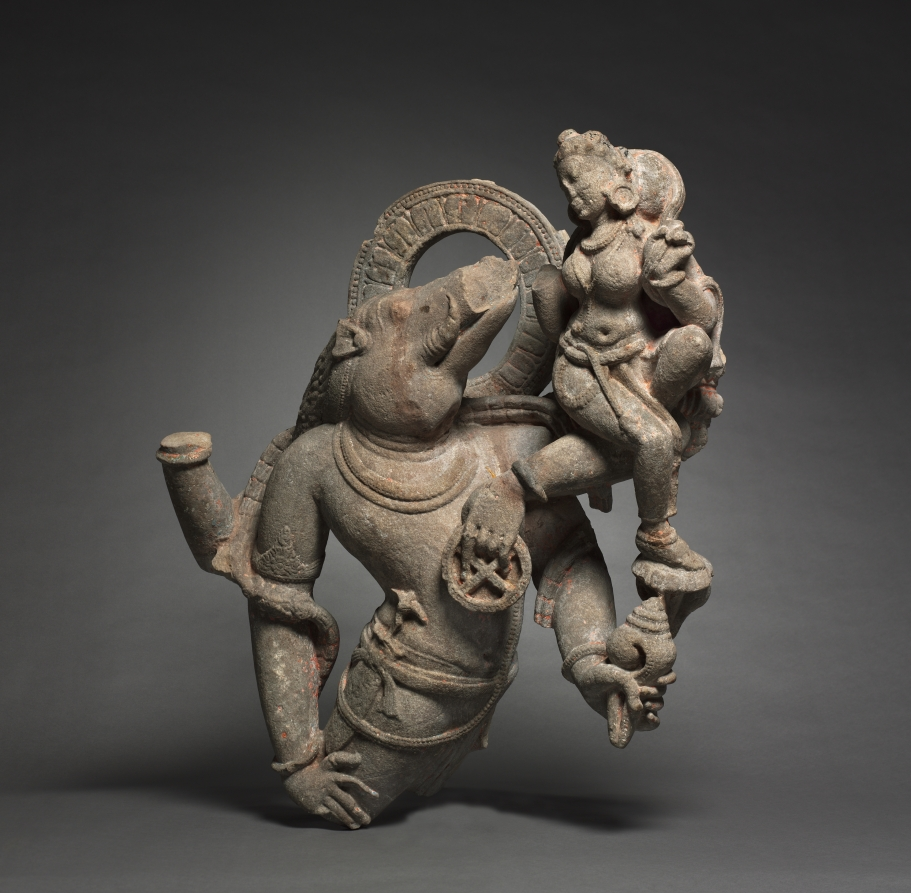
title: Varaha, Boar Incarnation of Vishnu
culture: Central India, probably Madhya Pradesh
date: 700–800s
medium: sandstone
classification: Stone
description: The Hindu god Vishnu took the form of a boar to rescue his wife Bhu (Earth in Sanskrit) from the bottom of the primordial ocean, where she had been hidden by a demon. Here shown with the head of a boar and the powerful lunging body of a warrior, Varaha holds out one of his four elbows as a seat for the earth goddess who he has rescued.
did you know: In his two left hands, he hold the conch and discus.